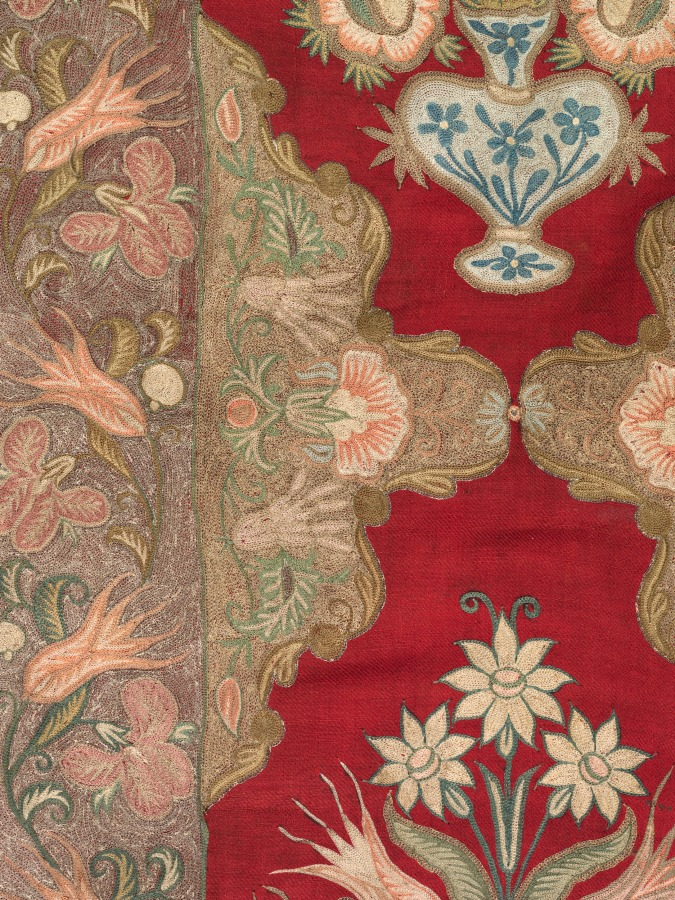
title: Embroidered Armenian liturgical curtain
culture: Turkey, Constantinople/Istanbul, Ottoman period (1299–1922)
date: 1763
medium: twill weave: wool; embroidery, chain stitch: silk, gilt- and silver-metal thread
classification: Textile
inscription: Inscription embroidered in erkatagir script with metal thread reads: "This curtain (varakouyr) is in memory of the people of Hassan Pasha Khan who gave it to the Monastery (vank) of Saint John the Baptist (Surp Garabed) on the Armenian date 10 May 1212 (1763 AD)."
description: This rare Ottoman embroidery features a floral bouquet that enriches the field under an elegant arch of gilt-metal thread. Flanked by vines of tulips and irises on a silver-metal-thread ground, vases of tulips and jonquils within cartouches adorn the main border and the well-turned corners, a sign of high quality. Dated 1763, the textile documents a mid-18th-century style and technique uncommon in Ottoman embroideries. The Armenian community commissioned this pattern for a liturgical curtain. Beneath the arch, Saint John the Baptist appears with a staff of victory, holding his own severed head in one arm and the Lamb of God in the other. The embroidered Armenian inscription reads: "This curtain is in memory of the people of Hassan Pasha Khan who gave it to the Monastery of Saint John the Baptist on the Armenian date 10 May 1212 [1763]."